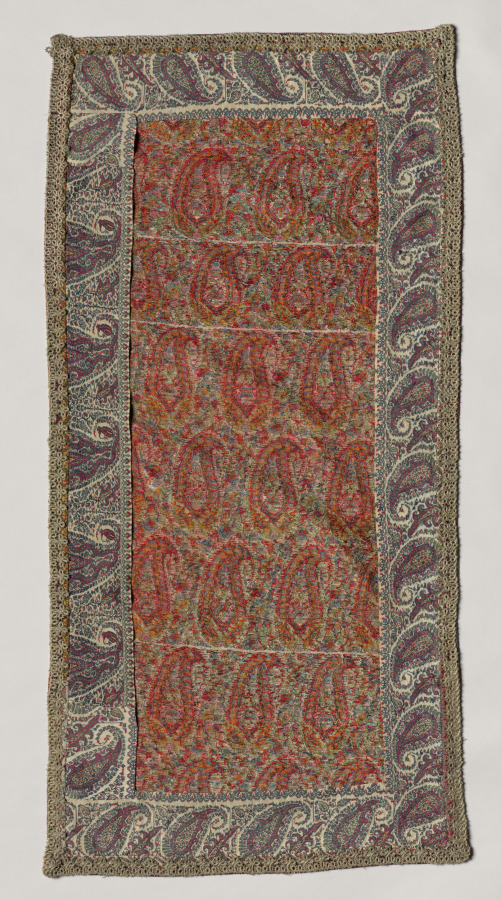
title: Lining from Silk Textile with Goatherds in a Landscape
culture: Iran, Isfahan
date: 1900s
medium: twill tapestry, double locked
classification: Textile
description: This textile has a repeated design of goatherds piping to goats in a landscape setting. At the top is an inscription reading: “Work of the servant of the court, Abū al-Quāsim Kāshānī, year 929.” In the Muslim calendar 929 is equivalent to 1523, but this fabric was woven in the 1900s. This textile emulates examples from the Safavid period (1501–1722), regarded as a high point of Iranian culture. A lampas weave is characterized by the combination of two weave structures with two sets of wefts—the threads over and under which the warp threads are woven. Threads of the pattern weft are laid on top of the background weft to form the design. Lampas is typically woven in silk, sometimes with the addition of metallic thread.